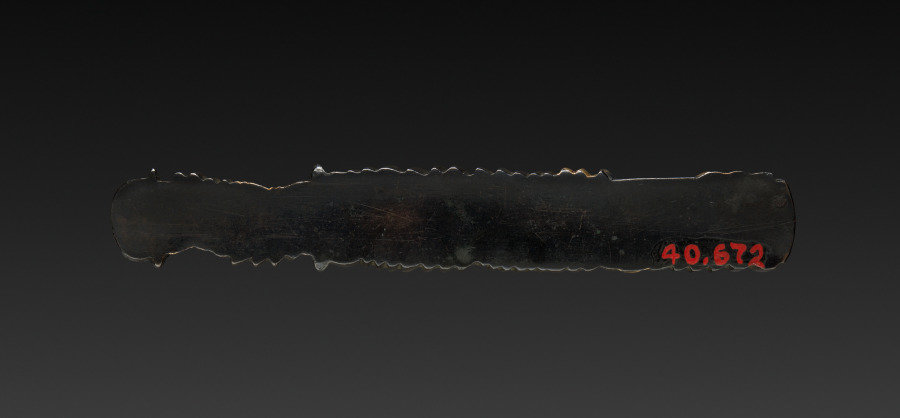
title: Knife Handle (Kozuka)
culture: Japan, Edo period (1615–1868)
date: early to mid-1800s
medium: iron and gold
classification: Metalwork